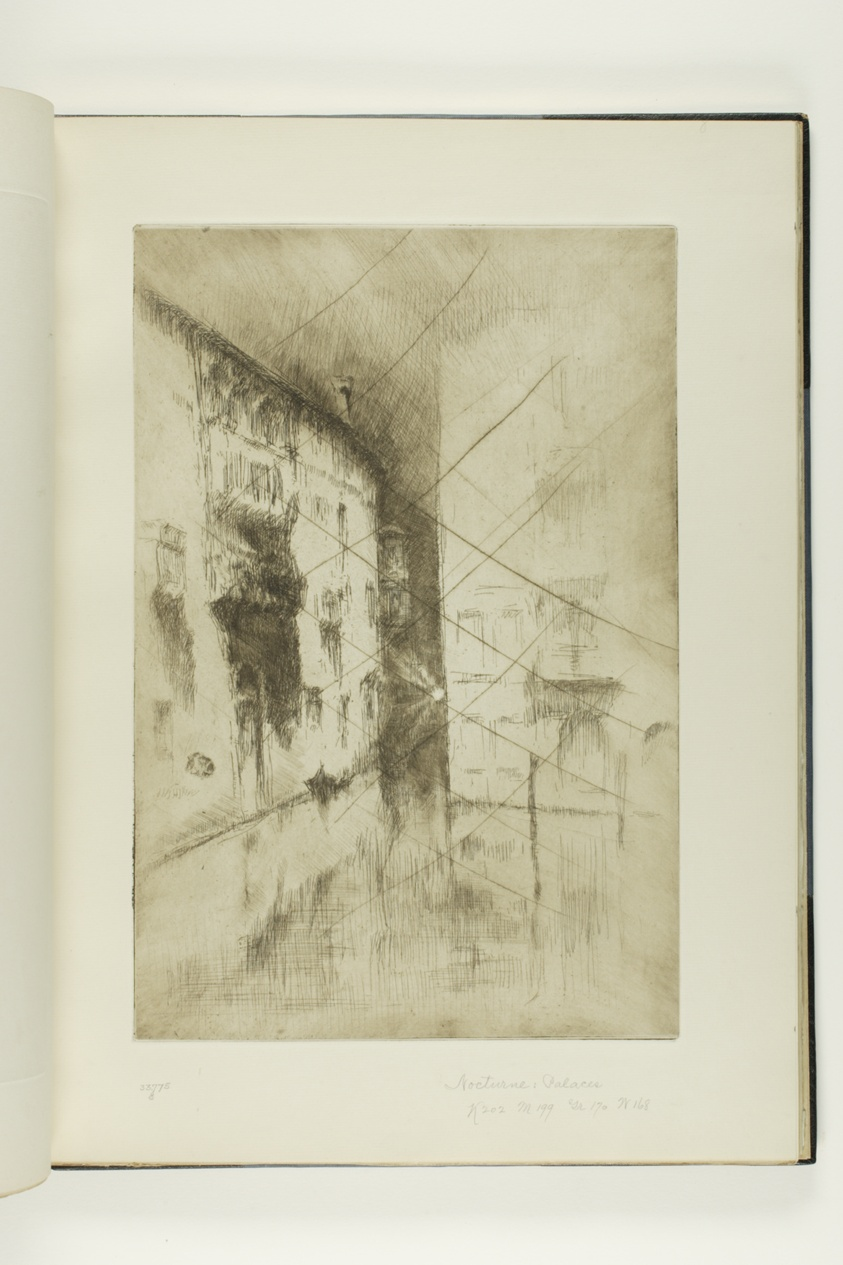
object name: Print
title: Nocturne: Palaces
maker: James McNeill Whistler (American, 1834-1903)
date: 1879/80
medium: Etching and drypoint with foul biting, with drypoint cancellation, in dark brown ink on ivory laid paper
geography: United States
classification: etching; prints and drawing; print; foul biting; drypoint; book; paper